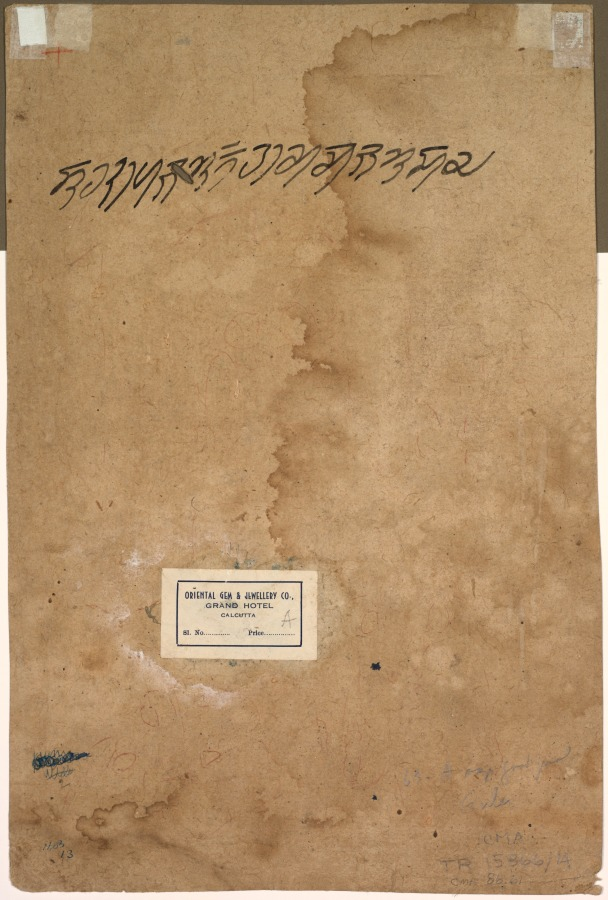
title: Radha and Krishna seated on a balcony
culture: Northern India, Pahari kingdoms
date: c. 1760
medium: Gum tempera, ink, and gold on paper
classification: Painting